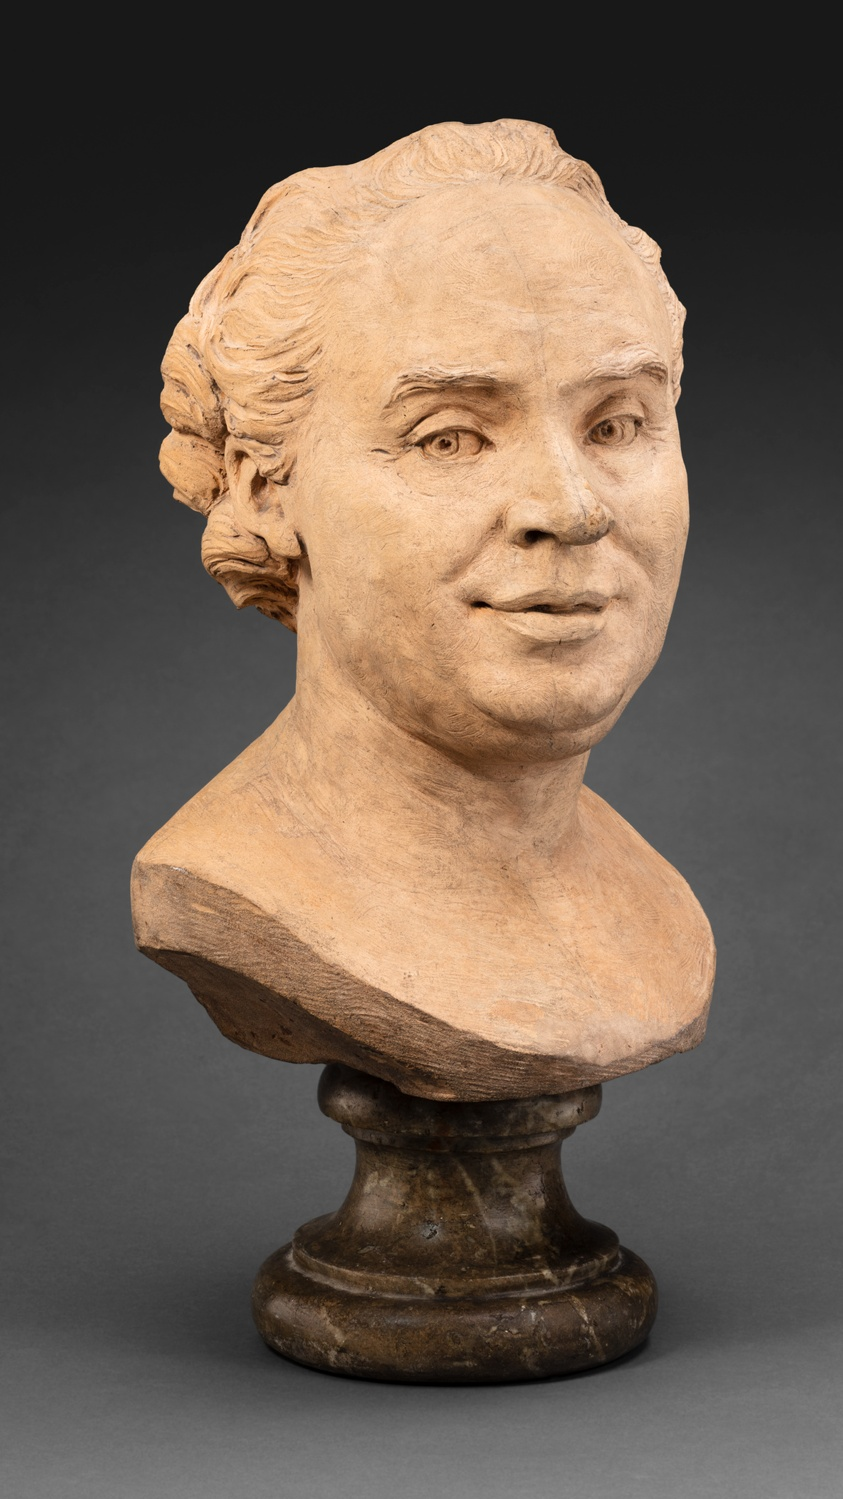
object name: Sculpture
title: Bust of Piron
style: 18th Century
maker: Attributed to Jean-Baptiste Lemoyne II (French, 1704–1778)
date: 1750/60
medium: Terracotta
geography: France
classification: bust/head; sculpture; portrait; french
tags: busts, head, man, portrait, portraits, portraits: male subject